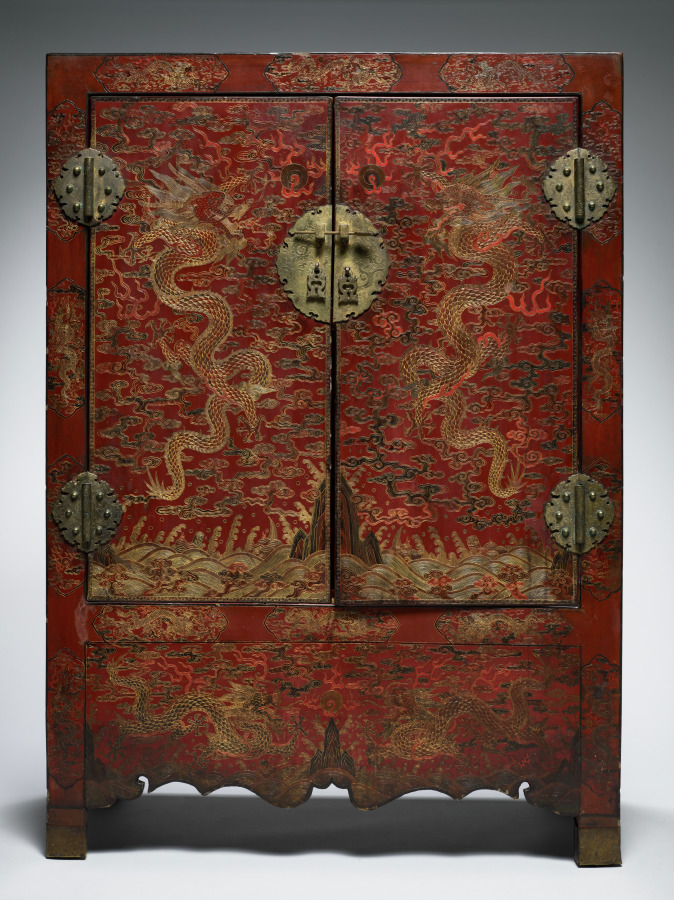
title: Cupboard of a Double Cabinet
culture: China, Ming dynasty (1368-1644) - Qing dynasty (1644-1911)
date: 1600s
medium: red lacquer on wood with pigment and gilding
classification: Furniture and woodwork